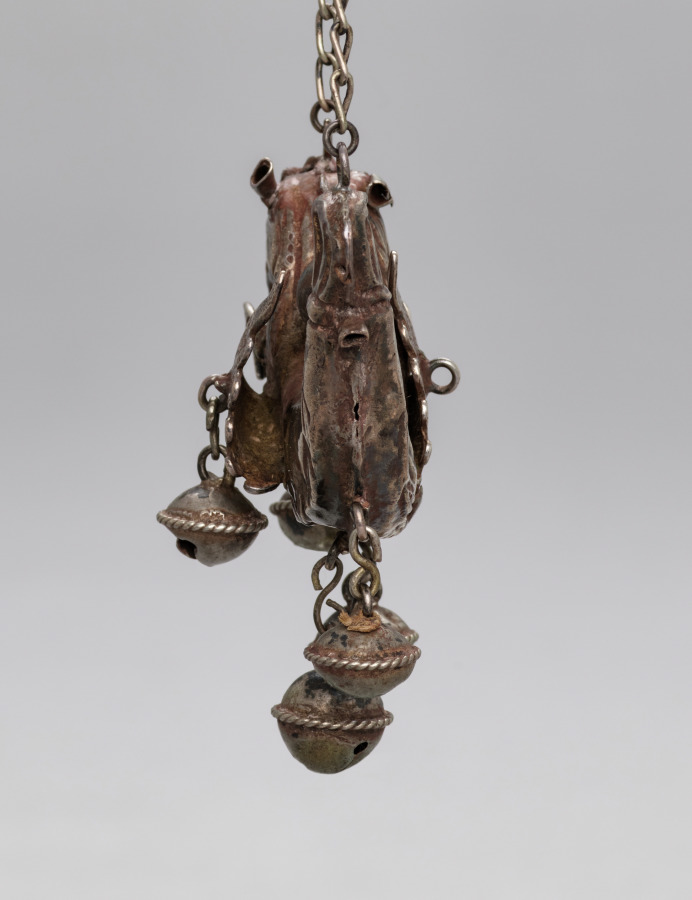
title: Rattle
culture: Italy, Sicily, 18th century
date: 1700s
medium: silver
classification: Silver